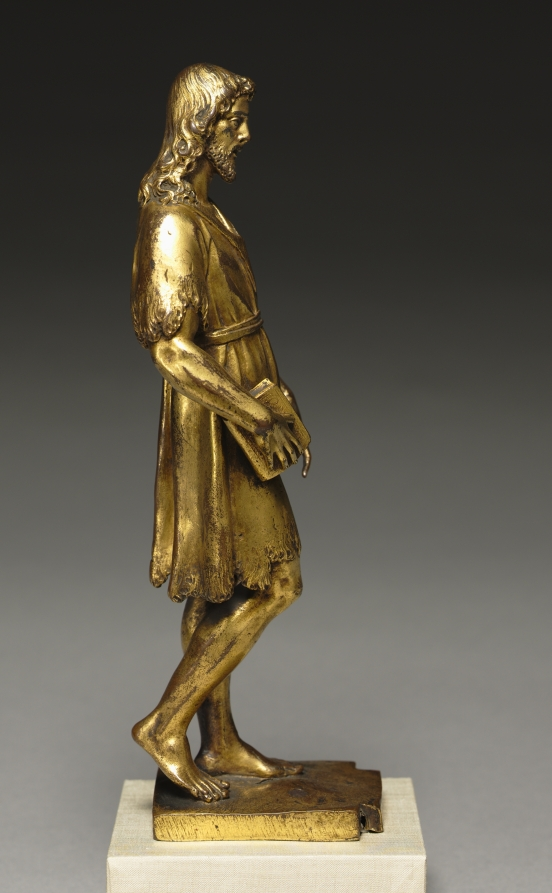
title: Saint John the Baptist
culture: Italy, Venice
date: c. 1550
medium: gilt bronze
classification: Sculpture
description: This small bronze, covered with gold, was produced in multiple versions. Saint John stands here, looking calm and composed, in a rather graceful pose. This piece has a sense of forward motion even though the figure appears to be leaning back in this stance. Elegant and subtle, this piece is a beautiful example of small cast Renaissance bronzes.